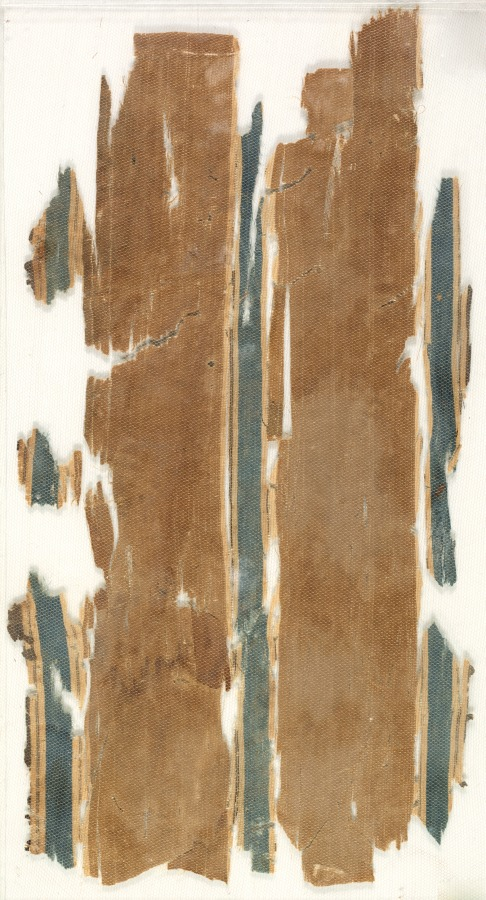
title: Silk fragment with striped pattern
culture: Syria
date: 900s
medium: plain weave variation with supplementary weft: silk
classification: Textile